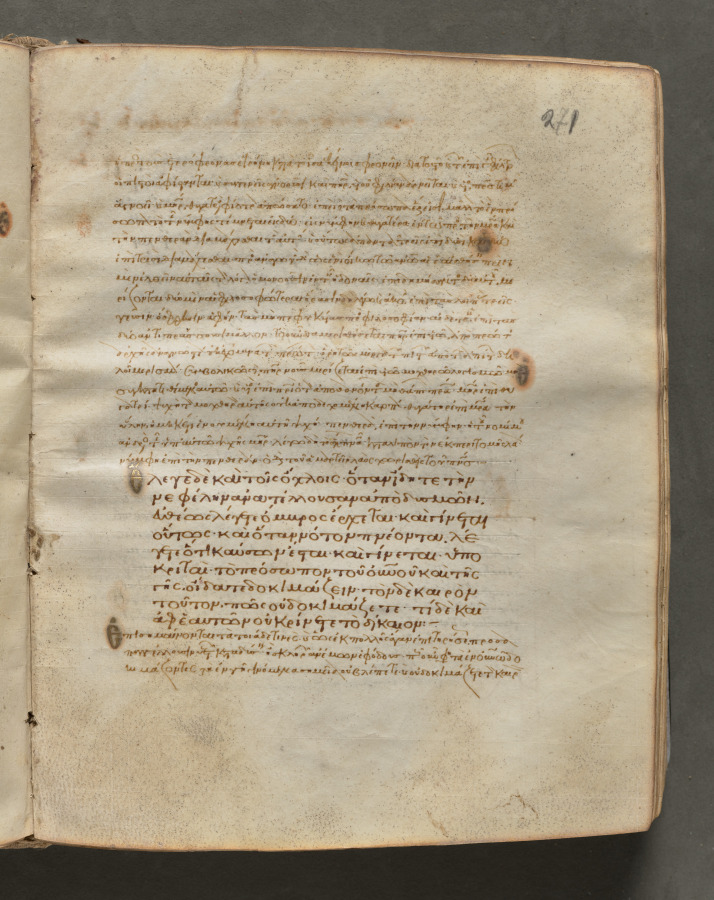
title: Text, folio 271 (recto), from a Gospel Book with Commentaries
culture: Byzantium, Constantinople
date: c. 1000–1100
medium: ink, tempera, and gold on vellum; leather binding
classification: Bound Volume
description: Each of the four gospels in this book opens on a page with brilliantly illuminated borders depicting the author of the text as well as birds—principally peacocks, symbols of the immortality of the soul—and fountains, representing the fountain of life and the salvation of the soul. This volume consists of 428 leaves with texts in Greek. Its level of sophistication suggests that it was probably written and decorated in a monastery in Constantinople.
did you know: Gospel books were carried in procession through Byzantine churches.